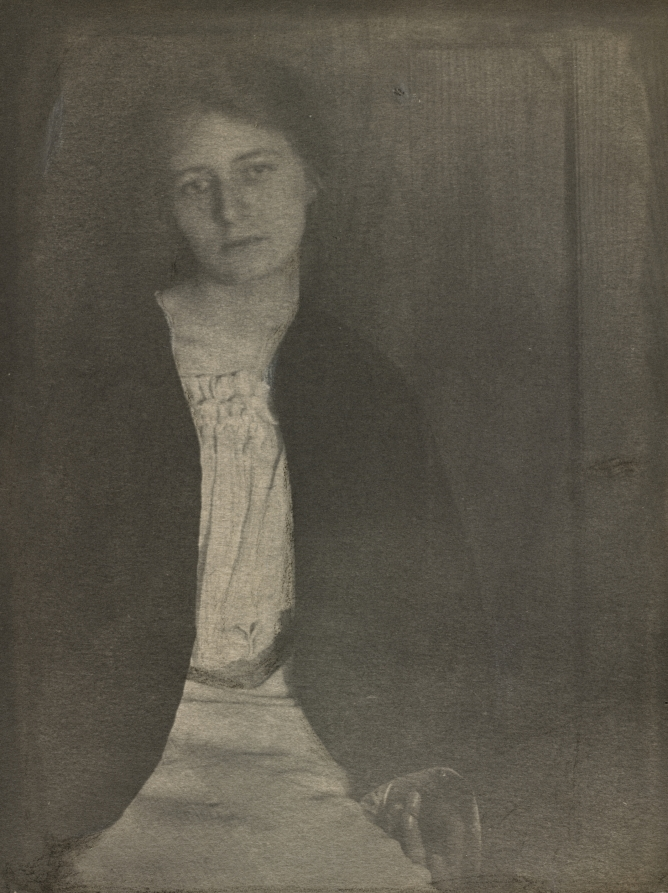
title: Julia Hall McCune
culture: America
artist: Clarence H. White (American, 1871–1925)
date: 1902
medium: platinum print with pencil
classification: Photograph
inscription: Written in pencil on recto of original mount: "Clarence H. White [signed] '02"; in pencil on verso: "19 [circled]"; "Portrait of Julia McCune / by Clarence White / 1902"